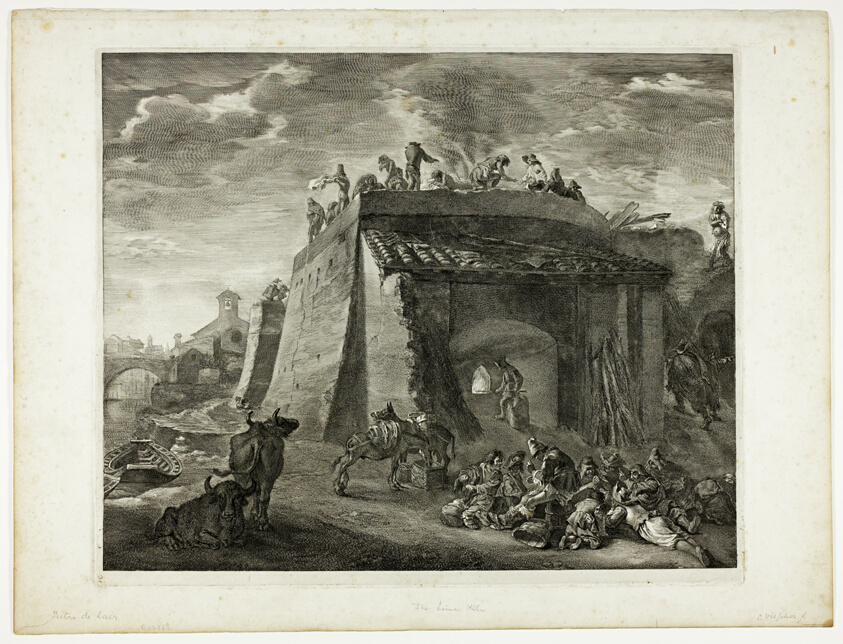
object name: Print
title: The Large Limekiln, from Cabinet Reynst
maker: Cornelis Visscher (Dutch, c. 1629-1658); after Pieter van Laer (Dutch, 1592-1642)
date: c. 1655-1658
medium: Engraving and etching in black on ivory laid paper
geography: Netherlands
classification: engraving; print; prints and drawing